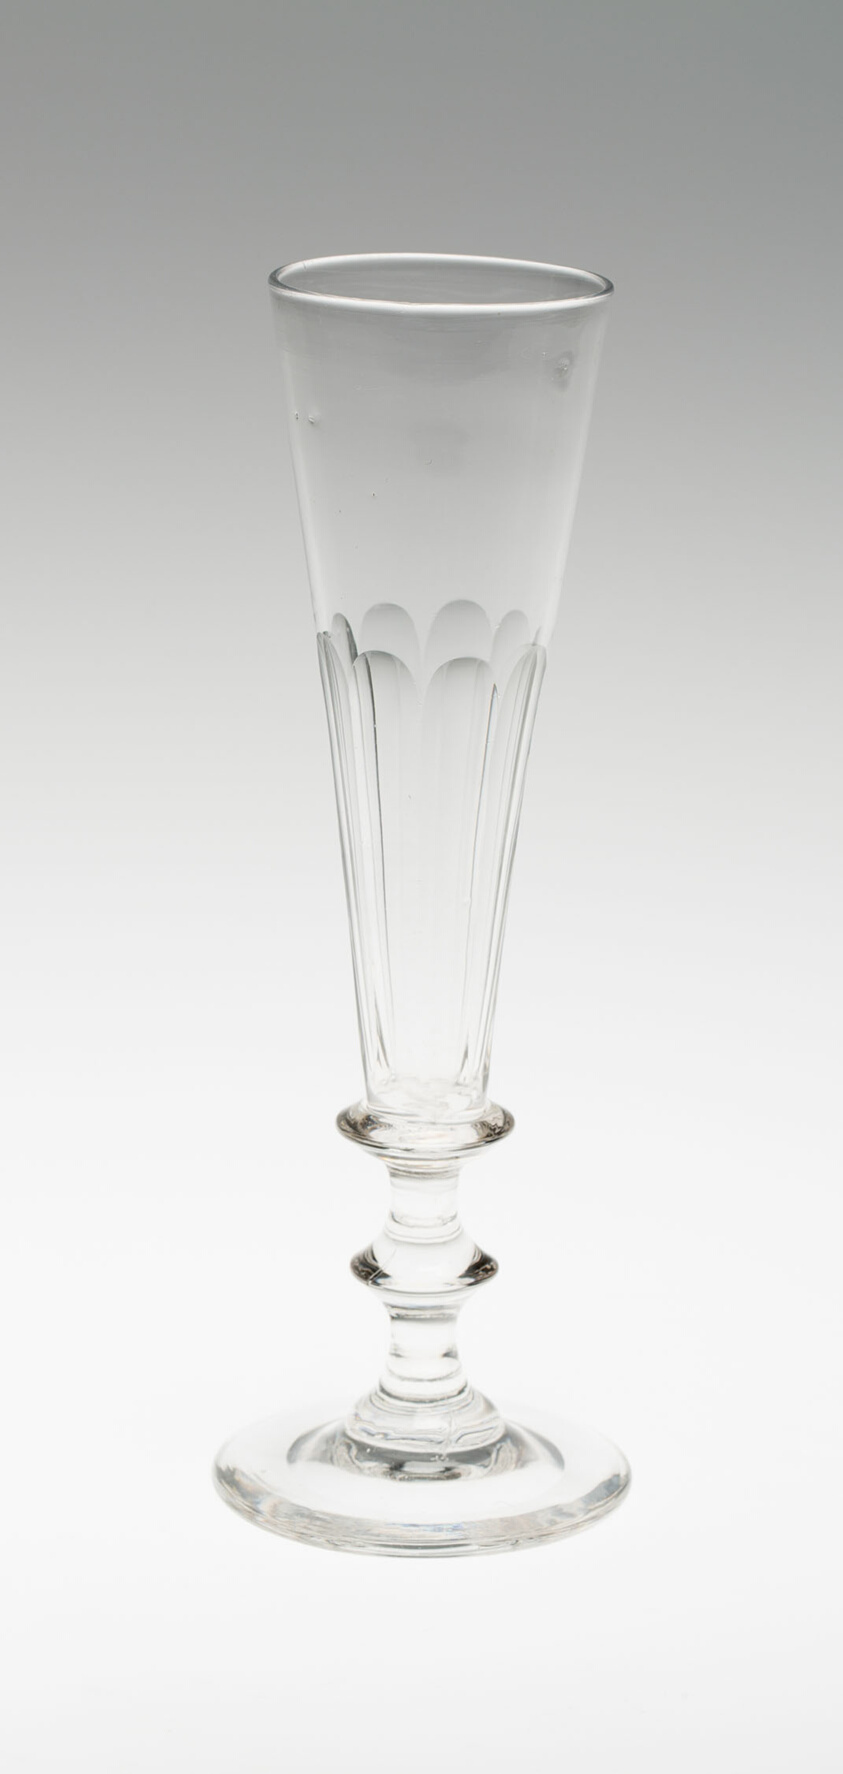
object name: Glass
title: Flute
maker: England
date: c. 1850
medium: Glass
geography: England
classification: glass